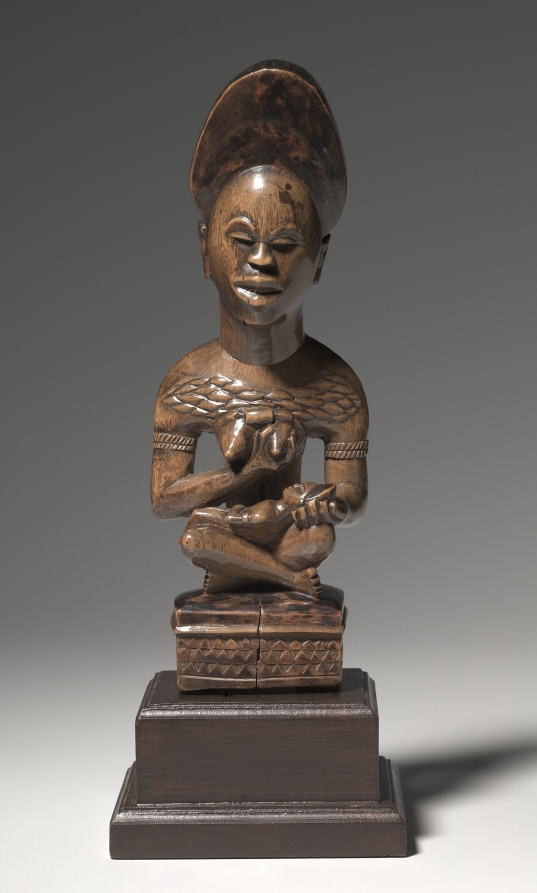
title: Woman and Child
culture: Africa, Central Africa, Democratic Republic of Congo, Yombe-style carver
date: mid- to late 1800s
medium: Wood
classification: Sculpture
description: This mother-and-child figure was probably part of a cult concerned with the treatment of infertility. Both her jewelry and her seated pose indicate that the woman occupied a high rank in her community. Her miter-shaped hairstyle, chiseled teeth, and raised body scars--considered to be marks of beauty and perfection--signal that the woman incarnates the founding ancestor of a kinship group.